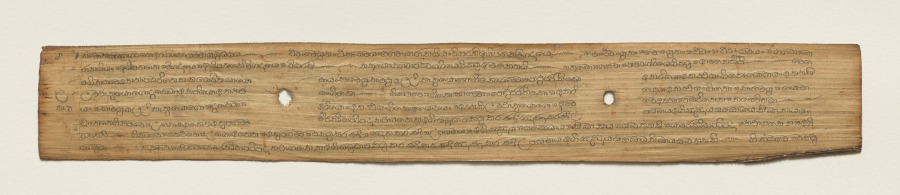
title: Leaf from a Buddhist Manuscript (recto)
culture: Sri Lanka, Singhalese, Late 17th century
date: c. 1700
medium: fiber paper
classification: Manuscript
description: Palm leaf material is still used for manuscripts in Sri Lanka. The palm leaves are prepared first by boiling them, drying them in the sun, and then rubbing them with oils. Scribes then use a metal stylus to incise the text. Then charcoal powder is wiped across the pages, filling in only the inscribed lines.